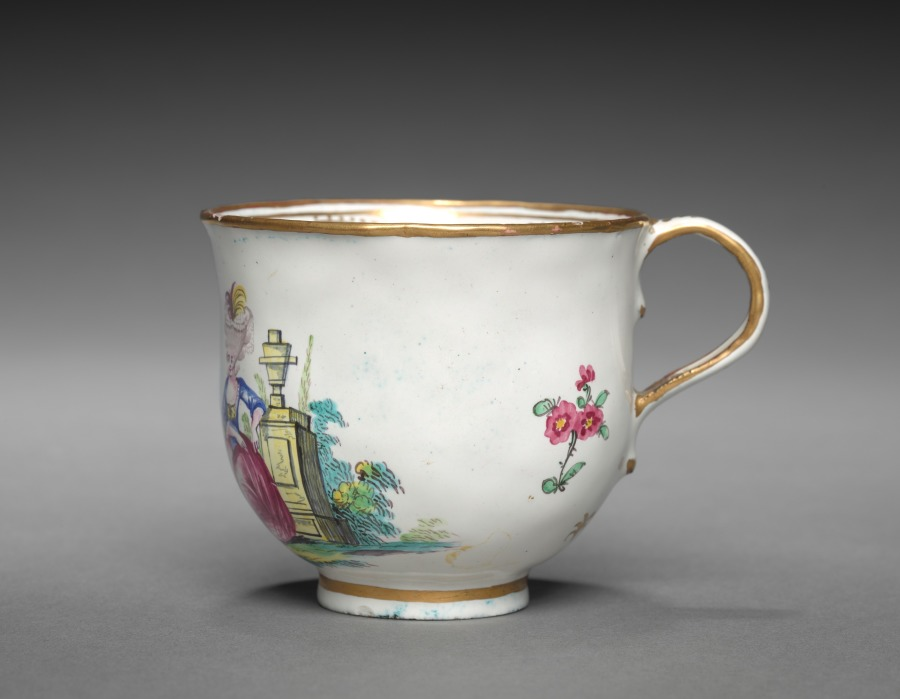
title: Cup and Saucer: Cup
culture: England, mid-18th Century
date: mid-18th century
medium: enamel on metal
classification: Enamel